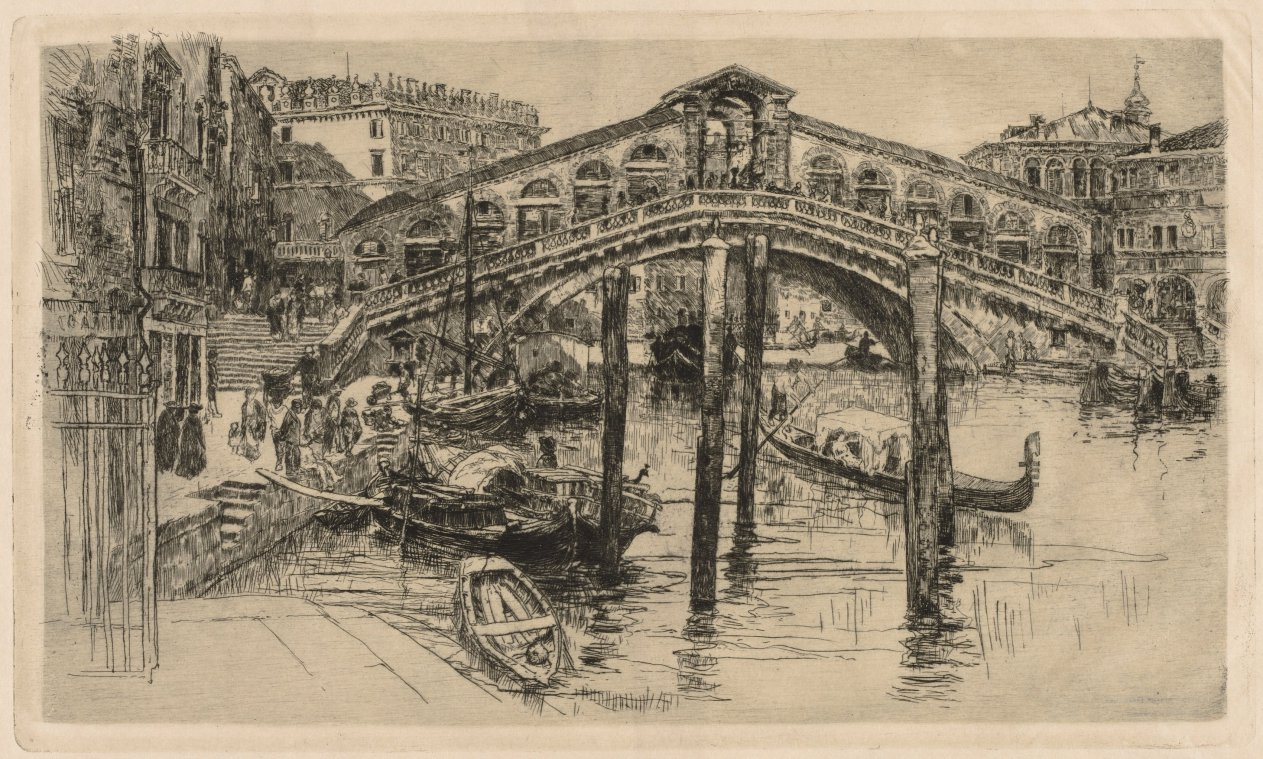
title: The Rialto, Venice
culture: America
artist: Frank Duveneck (American, 1848–1919)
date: 1883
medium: etching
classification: Print